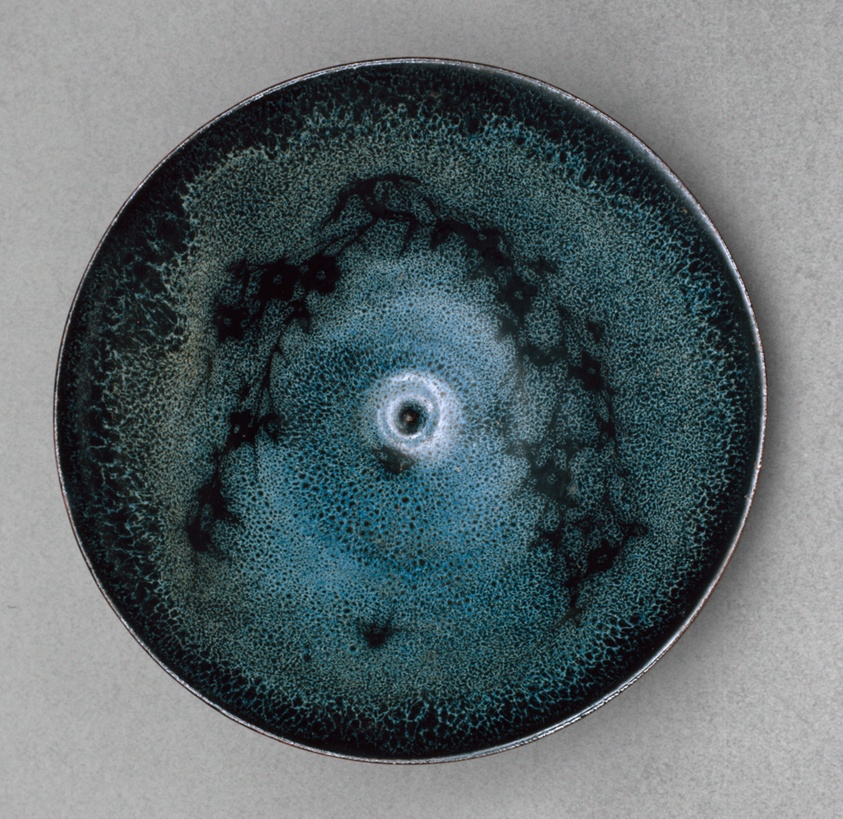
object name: Vessel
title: Conical Bowl with Blossoming Plum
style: Chinese (culture or style)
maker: China, Jiangxi province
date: Southern Song dynasty (1127–1279)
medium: Jizhou ware; glazed light gray stoneware with reserved papercut decoration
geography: China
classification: bowl; stoneware; dish (vessel); asian art; ceramics; vessel